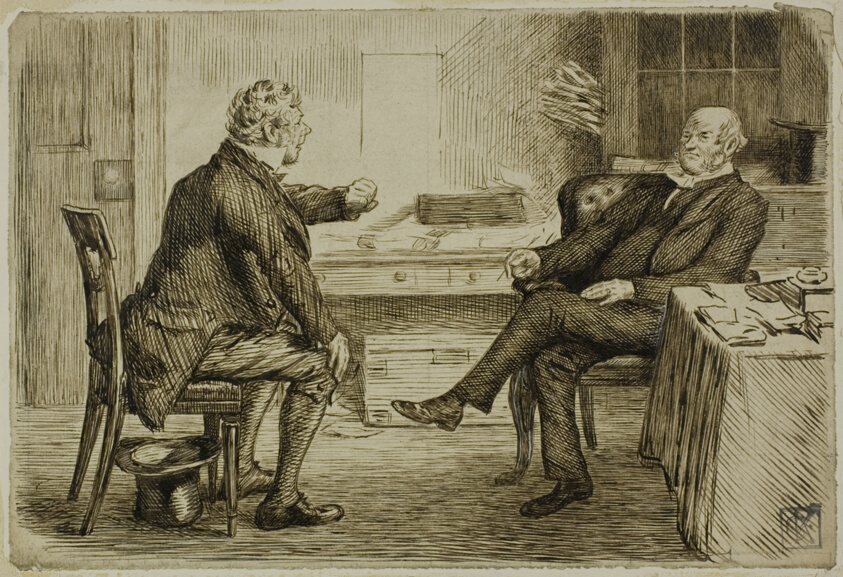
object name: Drawing and Watercolor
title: Solicitor and Client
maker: Charles Samuel Keene (British, 1823-1891)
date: 1870/91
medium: Pen and brown ink, with touches of white gouache, on cream wove paper, laid down on ivory wove paper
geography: England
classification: pen and ink drawings; drawings (visual works); prints and drawing